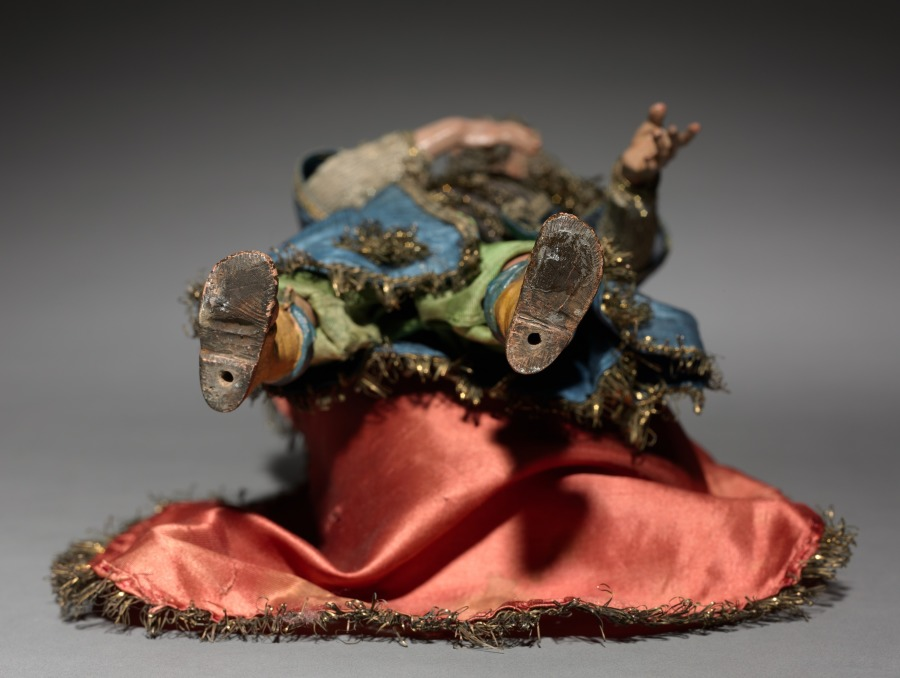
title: Figure from a Crèche: Magus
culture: Italy, Naples, late 18th-early 19th century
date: 1780–1830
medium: painted wood and terracotta with various textiles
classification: Sculpture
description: The practice of creating scenes of the Nativity for the home dates from the early 1700s in Italy, where people began to set up doll-like figures of about a foot or less in height. The custom was particularly popular in Naples around 1800, where crèche scenes (crèche means cradle, or crib) included many figures, whose heads and hands of painted terracotta, stuffed cloth bodies, and clothing adapted from contemporary local costumes gave them an amazingly realistic character. Representations of the birth of Jesus can be traced to the first few centuries of Christianity. Both living creatures and sculptural depictions of them were used from early times. By the late middle ages it was customary to create life-size figures of wood or stone, naturalistically painted, to represent the characters who participated in the events of Jesus's early life. These sculptures were then arranged in scenes illustrating one or both of the most important of these events, the Adoration of the Shepherds and the Adoration of the Magi-the three kings from the East who came to pay homage to the Christ child. Used in churches, these large figures were especially popular in Italy, Central Europe, Spain, and Portugal. This Object in Focus presentation was organized by Henry Hawley, Curator of Renaissance and Later Decorative Arts and Sculpture.